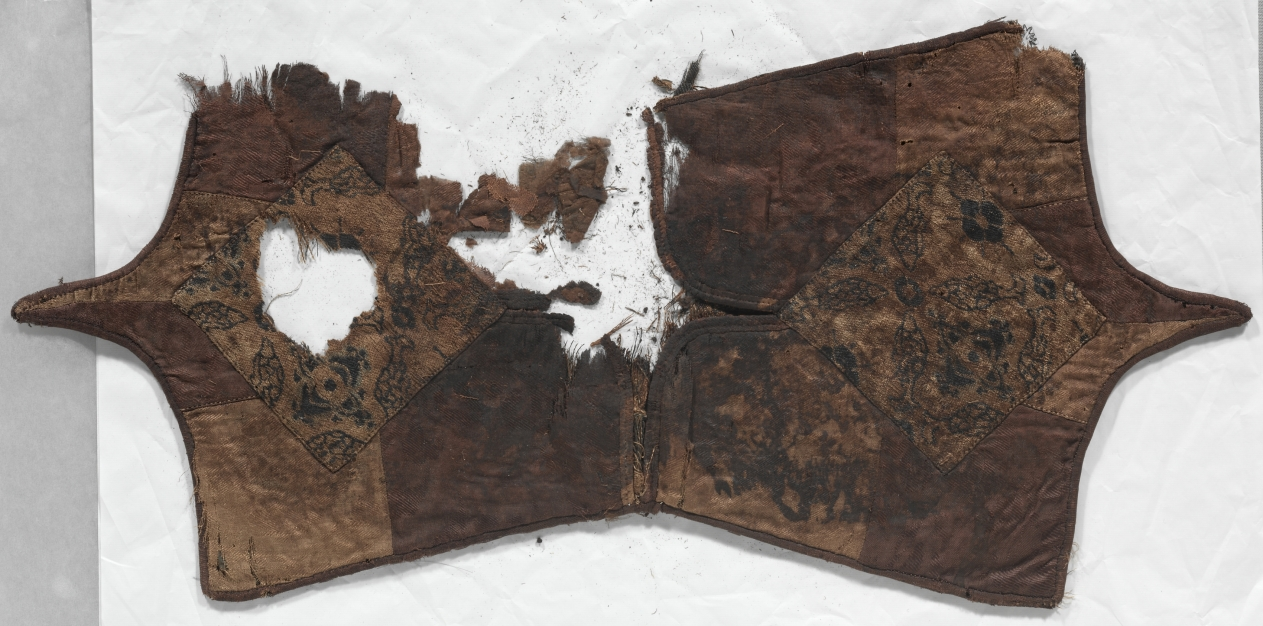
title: Object (Purpose Unknown)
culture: China, Liao dynasty (907-1125)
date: 907–1125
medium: damask; compound twill; silk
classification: Textile